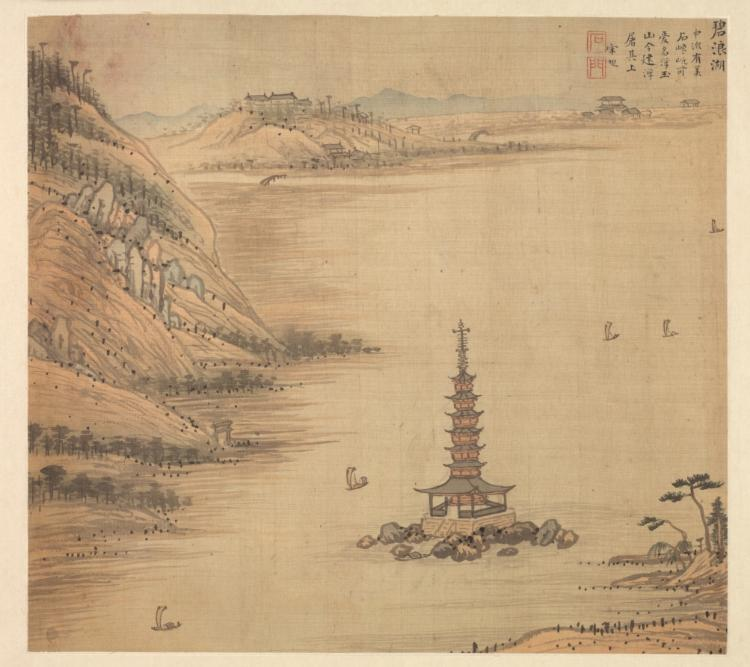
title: Bilang Lake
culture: China, Jiaxing, Ming dynasty (1368–1644)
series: Eighteen Views of Huzhou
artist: Song Xu (Chinese, 1525-c. 1606)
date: c. 1588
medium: Album leaf; ink and color on silk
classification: Painting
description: By the 1500s, visits to historic and scenic sites in the lower Yangzi delta stimulated an increase of printed illustrated travel books. Topographical depictions of local scenery flourished. Leaves from this album illustrates sites around Lake Tai of the two adjacent counties Changxing and Wuxing (modern Huzhou). Song Xu, who lived intermittently in Jiaxing and Songjiang, must have passed through Wuxing by boat and thus knew the region. The paintings are inscribed with gazetteerlike notations, suggesting that the album was produced for clients as commemorative works, a travel guide, or for “armchair travel” (woyou) in one’s mind.